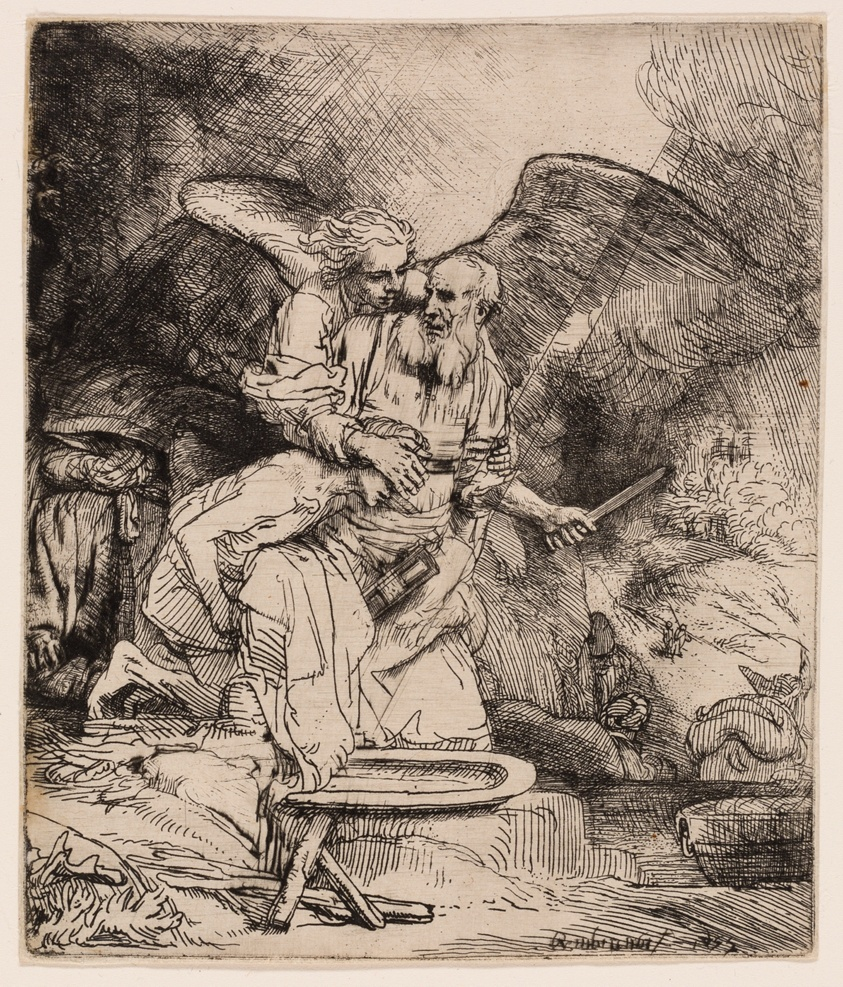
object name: Print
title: Abraham's Sacrifice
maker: Rembrandt van Rijn (Dutch, 1606-1669)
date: 1655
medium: Etching and drypoint on white laid paper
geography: Holland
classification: print; prints and drawing; paper; drypoint; etching